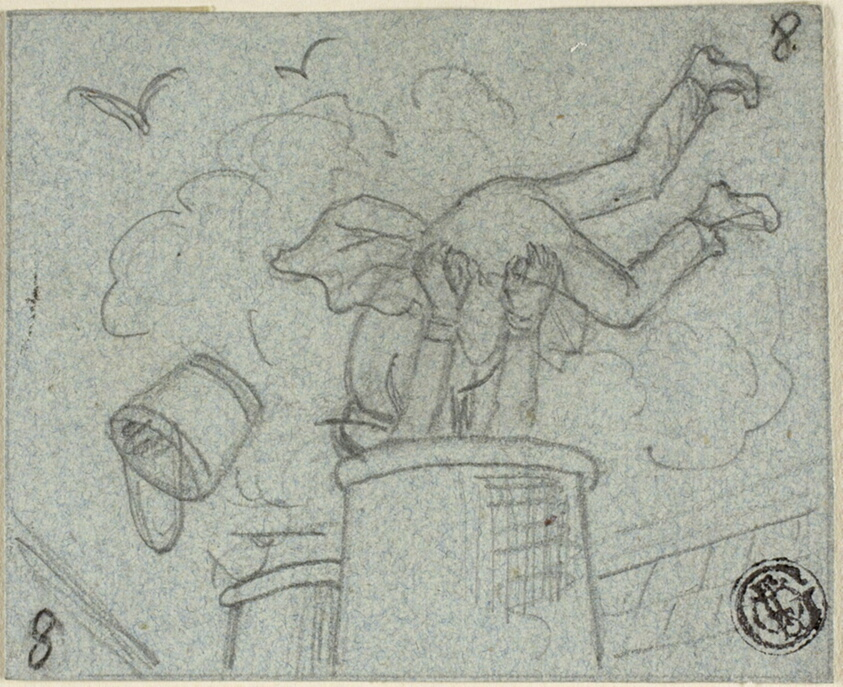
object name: Drawing and Watercolor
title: Episodes from White Chapel Life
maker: Attributed to John Leech; English, 1817-1864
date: c. 1850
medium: Graphite on blue wove paper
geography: England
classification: graphite; drawings (visual works); prints and drawing